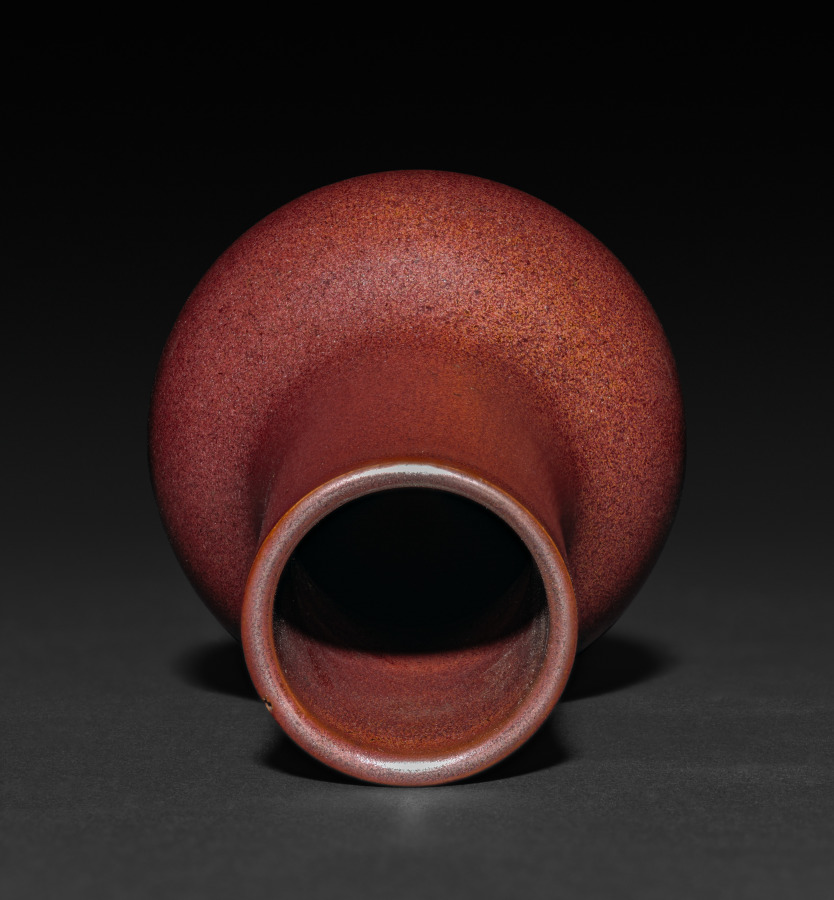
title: Bottle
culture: China, Qing dynasty (1644–1911), Qianlong reign (1736–95)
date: 1736–95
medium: porcelain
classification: Ceramic